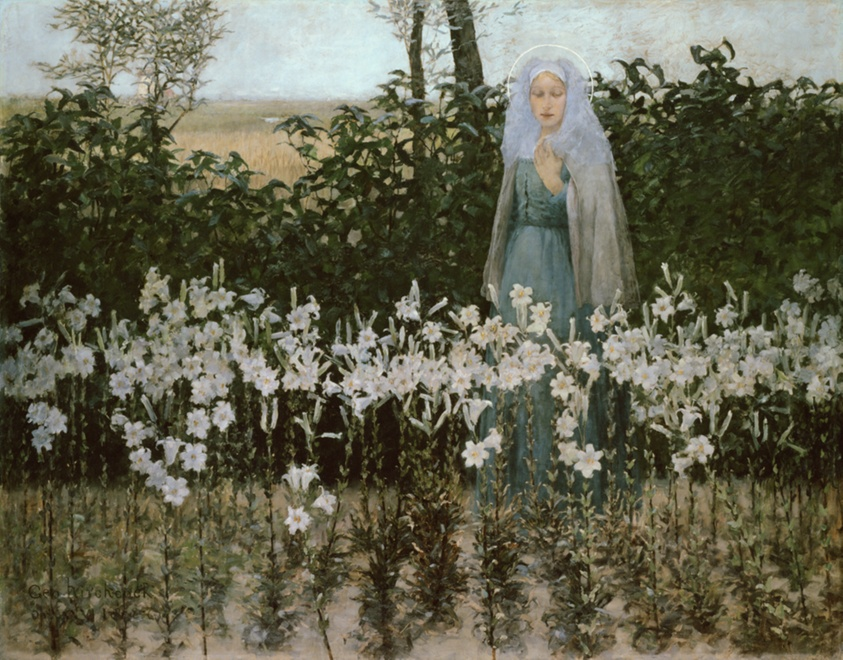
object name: Painting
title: The Annunciation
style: Impressionism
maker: George Hitchcock (American, 1850–1913)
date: 1887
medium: Oil on canvas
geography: United States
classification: painting; american arts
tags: people, Chicago, landscapes, portraits